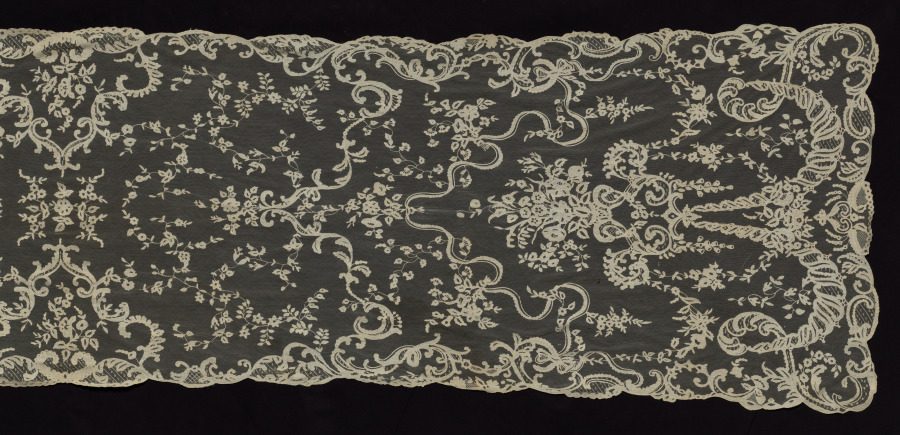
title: Lace Veil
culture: Ireland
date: 1800s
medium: Machine-made lace net (Carrickmacross) with appliqué and tambour work (chain stitch)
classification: Lace